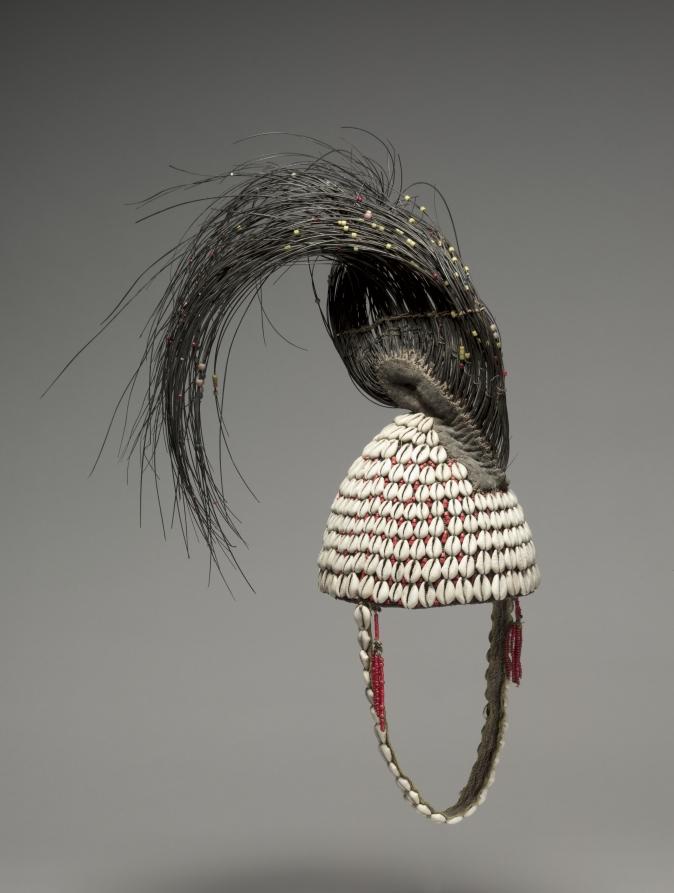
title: Bwami Prestige Cap (Mukuba or Nkumbu)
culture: Africa, Central Africa, Democratic Republic of Congo, Lega-style maker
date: early to mid-1900s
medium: Plant fibers, elephant rawhide and hair, cowrie shells, glass beads, and cord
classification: Garment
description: Hats of different types, sizes, and materials figure prominently in the Lega people’s Bwami association where they indicate status and rank. Cone-shaped hats made of canvas covered with cowrie shells and surmounted by an elephant tail are worn during initiations into kindi, the highest of the five male grades. This prestige cap uses a variety of local and imported materials to show its wearer's importance. The plant fibers that support the hat and the elephant hair were sourced in Central Africa, while the beads and cowrie shells were imported. The beads were made in Europe, while the cowrie shells came from the Indian Ocean region. The might of Bwami members is likened to the elephant’s potentially destructive strength.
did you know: While identified with Africa, cowrie shells were generally imported from the Indian Ocean region. After being collected near the Maldives islands, these Indo-Pacific shells entered parts of Africa via overseas trade routes.